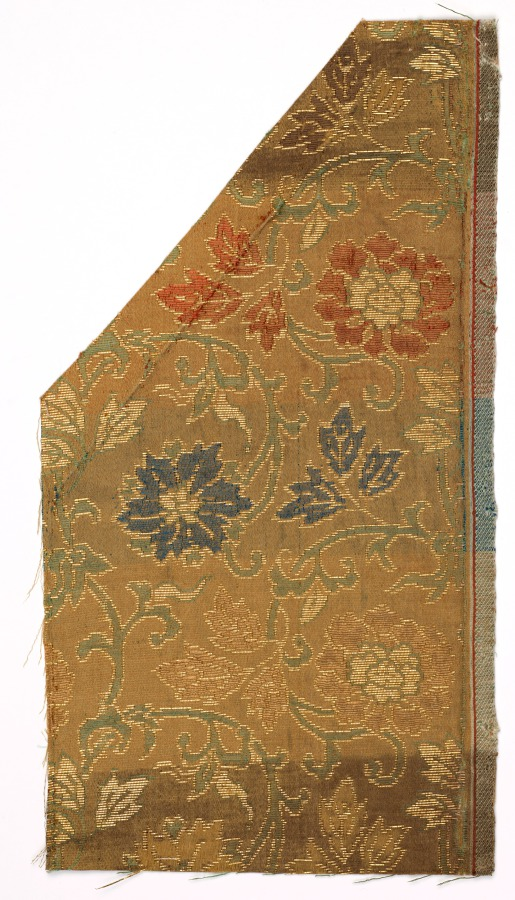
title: Textile Fragment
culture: Japan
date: 1800s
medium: silk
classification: Textile